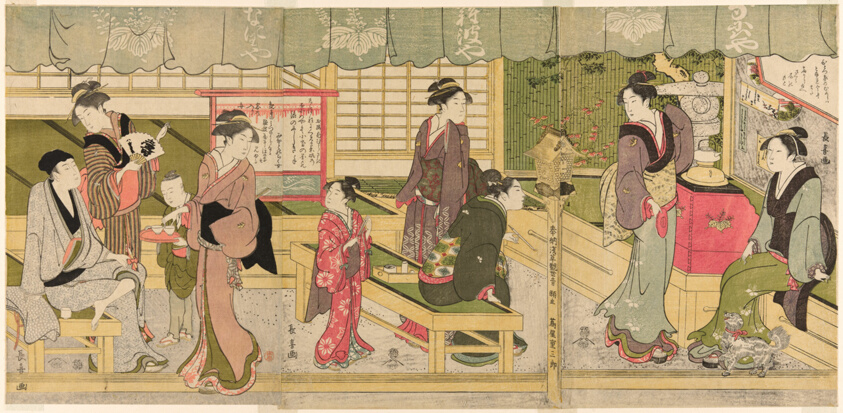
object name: Print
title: The Front Room of the Naniwaya (Naniwaya misesaki)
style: Japanese (culture or style)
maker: Eishosai Choki (Japanese, active c. 1790s-early 1800s)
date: c. 1800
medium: Color woodblock prints; aiban triptych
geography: Japan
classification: woodblock print; print; asian art